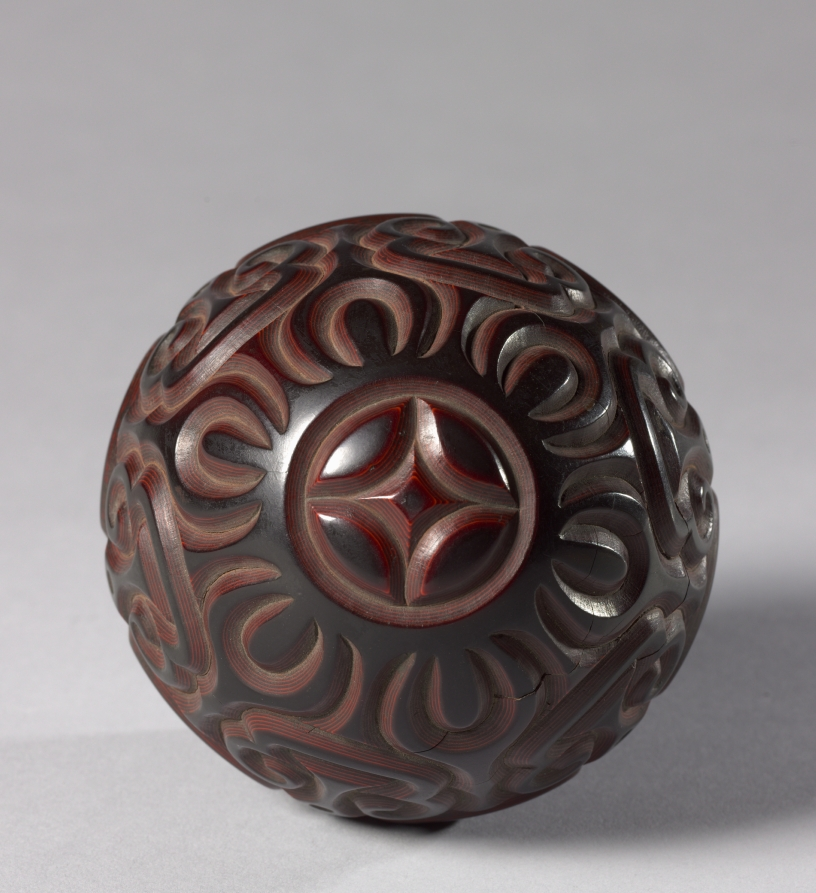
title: Tea Cup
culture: China, Ming dynasty (1368–1644)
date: early 1500s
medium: guri lacquer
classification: Lacquer